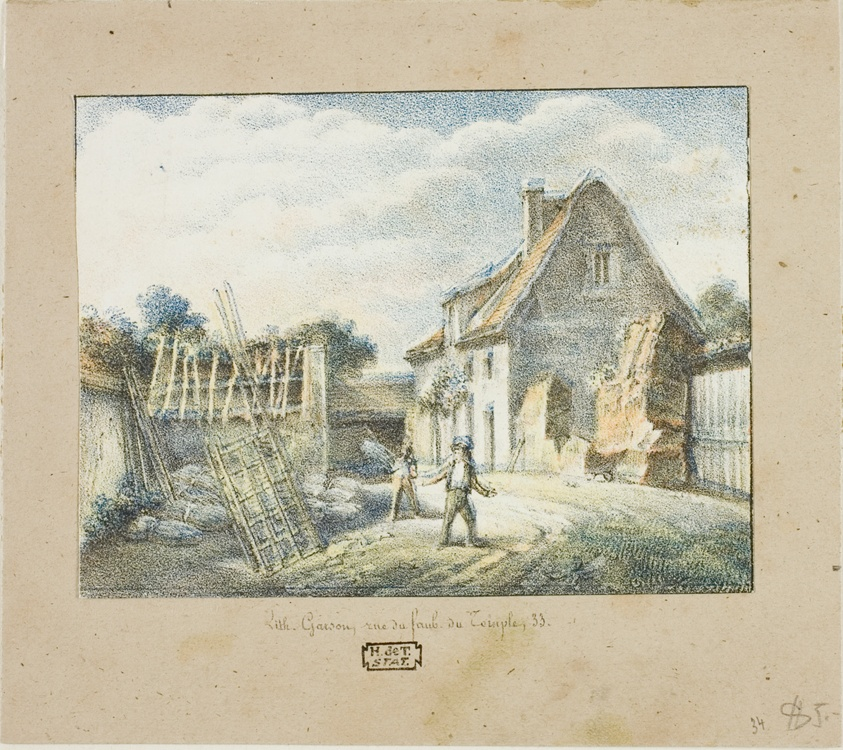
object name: Print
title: Village Scene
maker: Victor-René Garson (French, 1796-1850)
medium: Color lithograph on white wove paper, laid down on buff wove paper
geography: France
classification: lithograph; print; prints and drawing